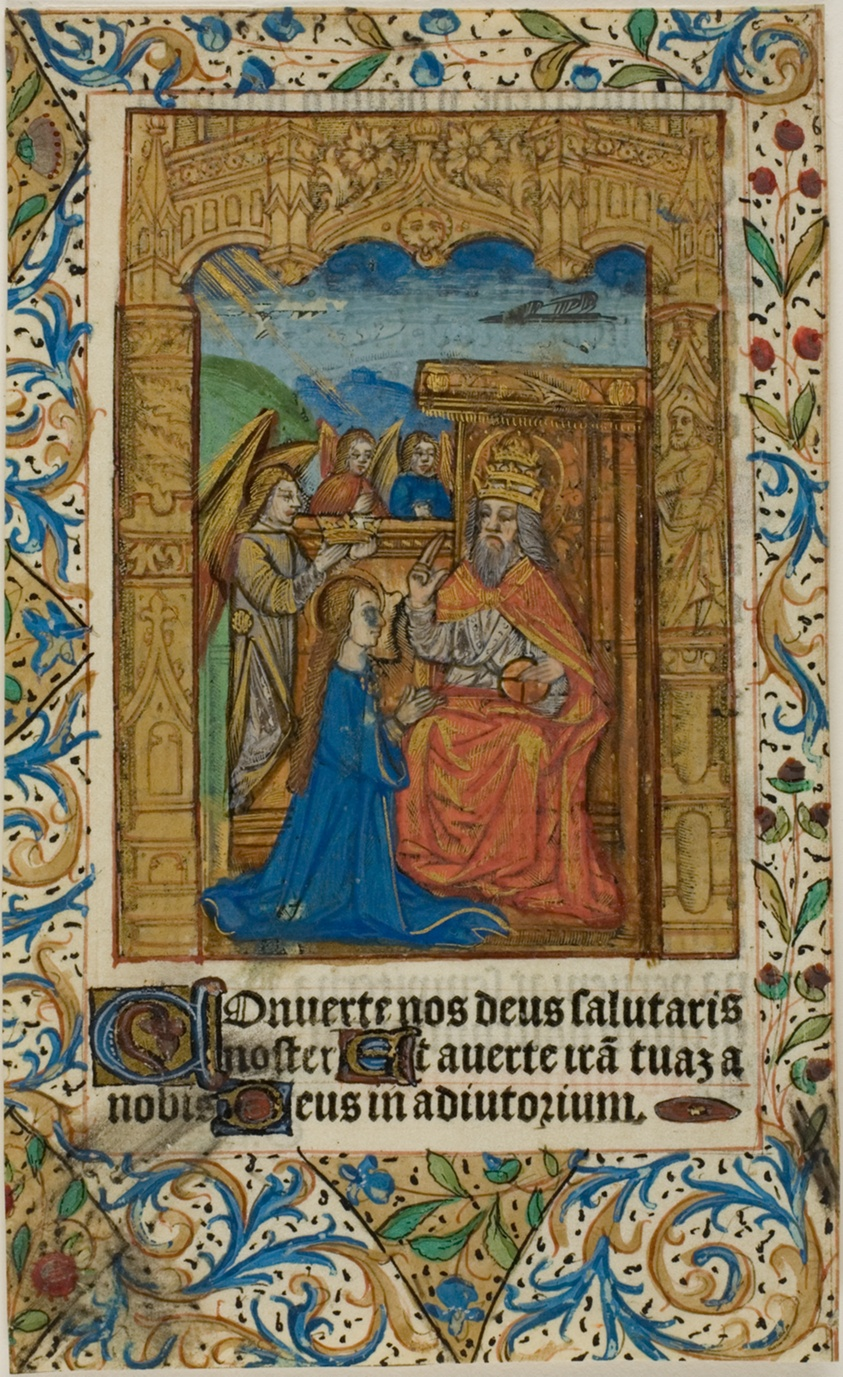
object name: Drawing and Watercolor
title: Coronation of the Virgin with Decorative Border from a Prayerbook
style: medieval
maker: European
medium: Manuscript cutting in tempera, red, brown and black ink, gold paint and gold leaf, with Latin inscriptions in black ink, ruled in red, and further inscriptions and decorations, verso, on parchment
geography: Europe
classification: tempera; manuscript; drawings (visual works); prints and drawing